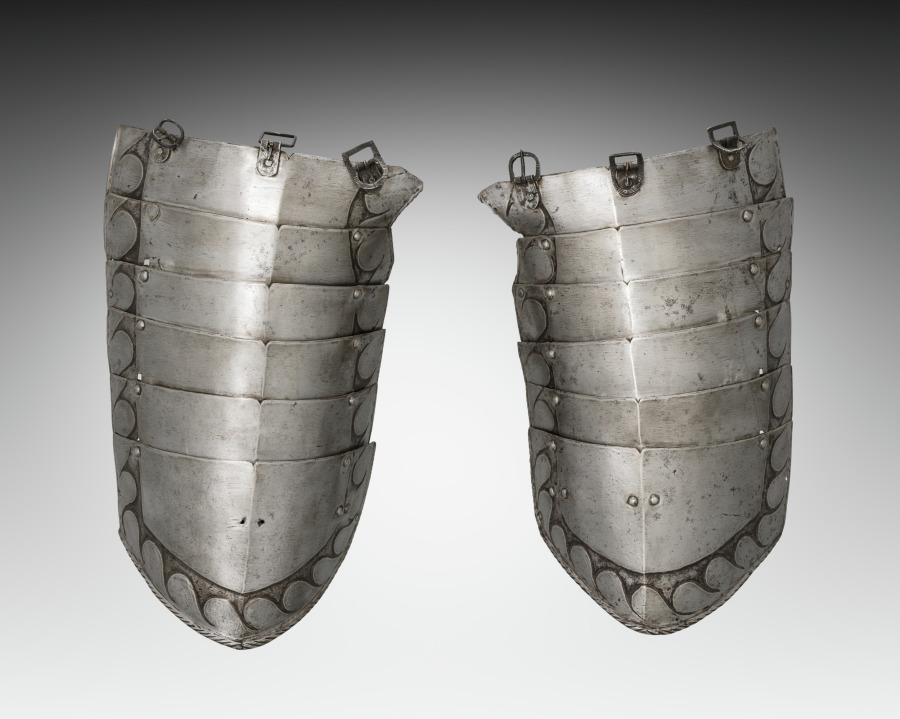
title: Pair of Tassets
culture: Germany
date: c. 1540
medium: steel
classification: Arms and Armor